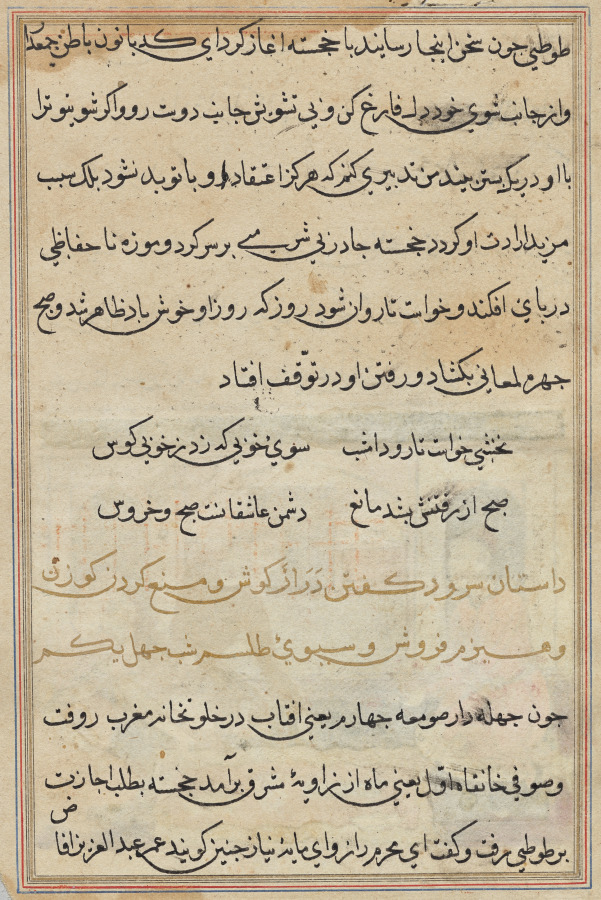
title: Page from Tales of a Parrot (Tuti-nama): text page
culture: Mughal India, court of Akbar (reigned 1556–1605)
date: c. 1560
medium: gum tempera, ink, and gold on paper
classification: Painting